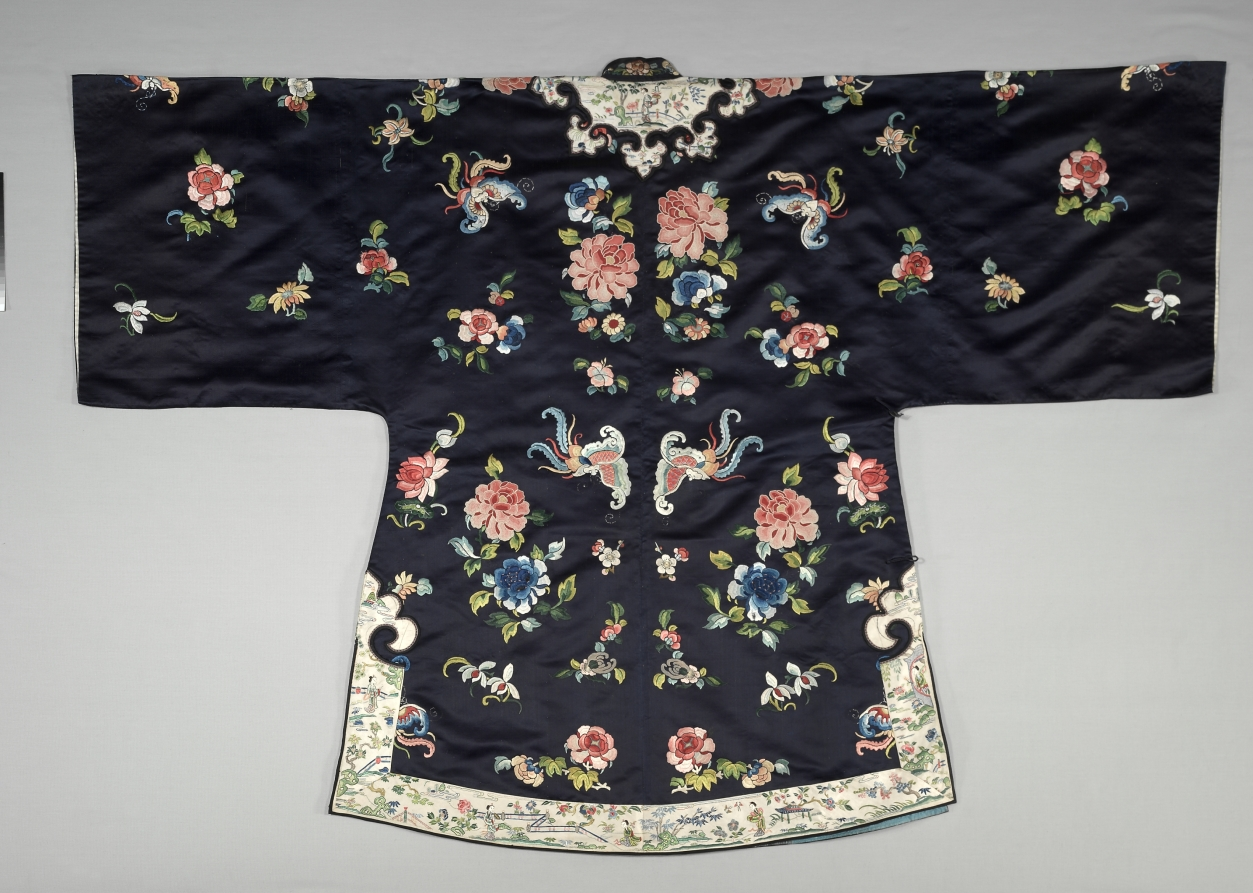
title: Han Woman's Jacket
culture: China, Qing dynasty (1644–1911)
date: late 1800s with additions from 1950s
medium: Silk, embroidery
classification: Garment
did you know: The sleeves could be turned back revealing a band embroidered with women in a landscape of flowers, trees, bridges, and pavilions.